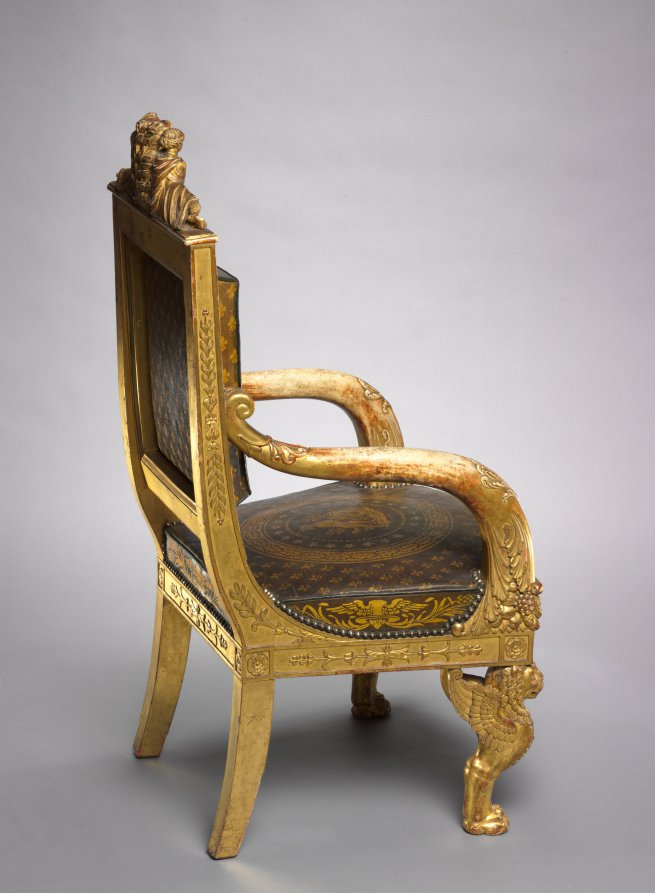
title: Child's Throne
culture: France, Paris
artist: Pierre-Marie Balny le Jeune (French, 1832)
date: 1822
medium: carved and gilded wood, leather upholstery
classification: Furniture and woodwork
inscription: inscribed with stencils inside back rail: BLONDEL TAPISSIER/RUE ST. ANTOINE N 72 1822 inscribed in ink lower edge back rail: 12 JANVIER 18[22?]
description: This chair was made for the young, presumed successor to the French throne who ruled briefly as Henri V in 1830, the last of the direct Bourbon line. He is depicted at the center of the top rail protected by female figures representing France and Minerva, the Roman goddess of wisdom. Fleurs-de-lis and the Gallic rooster, symbols of French royalty and the French people, decorate the upholstery.